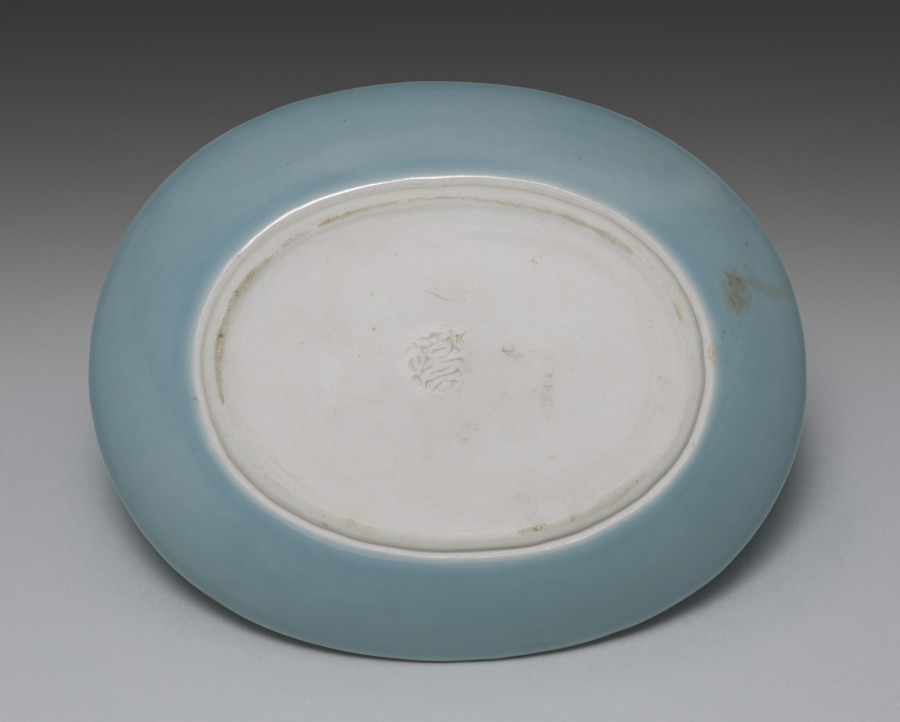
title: Dish from Dishes with Shells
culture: Japan, Meiji period (1868–1912) or Taishō period (1912–26)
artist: Seifū Yohei IV (Japanese, 1872–1951)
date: 1914–46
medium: One from a set of five dishes; porcelain with blue glaze, iron oxide, and molded design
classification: Ceramic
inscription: 清風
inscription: 清風造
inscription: 清風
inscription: 成山清風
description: Yohei IV chose an aquatic theme for this set of five mukōzuke, side dishes. He added an iron oxide rim and used a concentrated blue glaze on both the interior and exterior. The glaze, named on the box lid, is his father’s “evening moon” (tsukiyoi) color. The conch in relief takes up the entire bottom of the dish. Up the sides are two snails on one end and on the other a scallop. This results in a boldly graphic, less realistic effect.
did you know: This set of dishes, mukōzuke, could be used for serving small side dishes at a tea gathering.